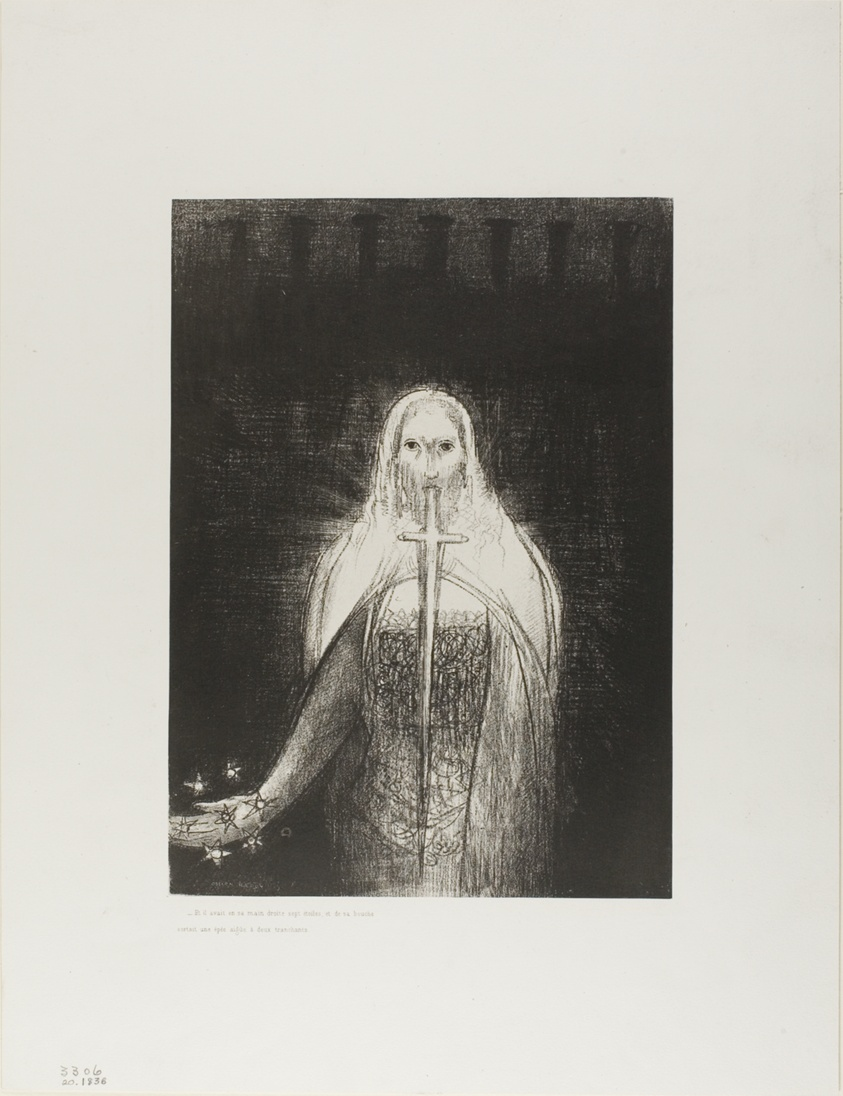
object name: Print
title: And He Had in His Right Hand Seven Stars; and Out of His Mouth Went a Sharp Two-Edged Sword, plate 1 of 12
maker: Odilon Redon (French, 1840-1916)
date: 1899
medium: Lithograph in black on cream China paper laid down on ivory wove paper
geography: France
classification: lithograph; print; prints and drawing; paper